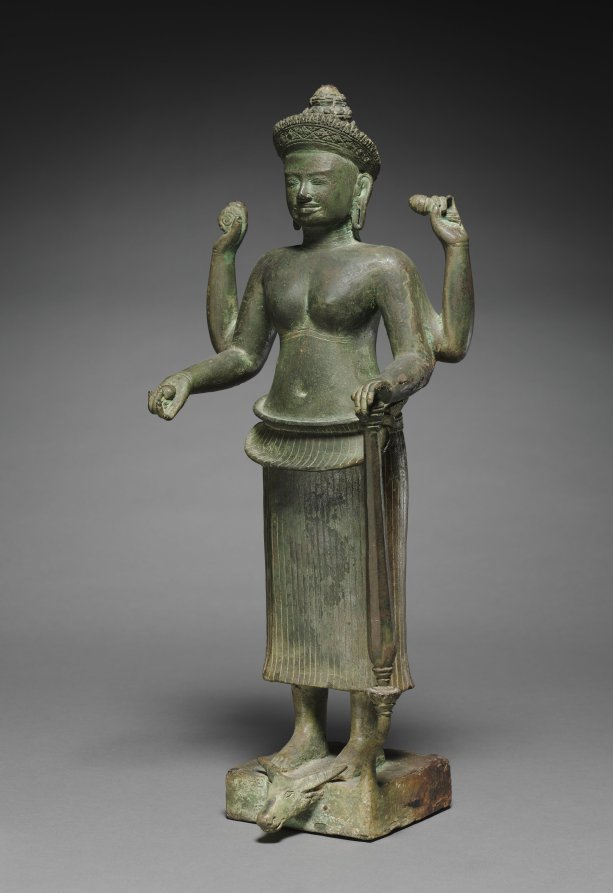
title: Durga as the Slayer of the Buffalo Demon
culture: Cambodia, probably Koh Ker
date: 900s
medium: bronze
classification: Sculpture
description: This depiction of Durga is rare and important, as it is a large-scale example of the goddess in bronze. Her conquest over the buffalo demon is indicated by its severed head at her feet. She stands four-armed and triumphant, with a wheel, conch shell, mace, and clod of earth in her hands.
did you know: The figure wears a head-dress, kirita-makuta, a diadem tied in the back and pointed at top.